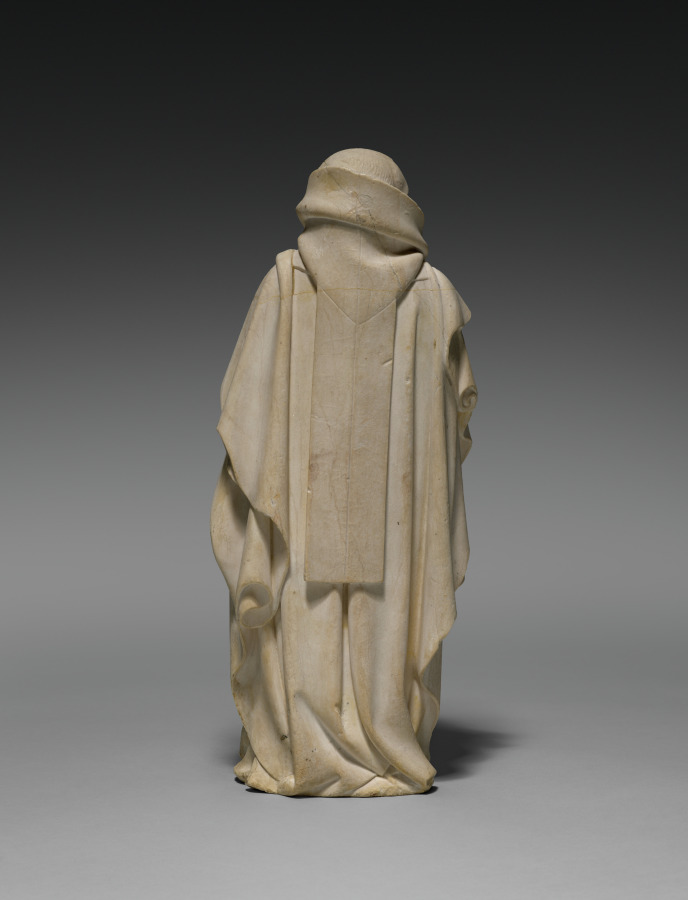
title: Mourner from the Tomb of Philip the Bold, Duke of Burgundy (1364–1404)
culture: Netherlands, active Dijon, 15th century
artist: Claus de Werve (Netherlandish, 1380–1439)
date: 1404–10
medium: vizille alabaster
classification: Sculpture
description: This figure comes from the tomb of Duke Philip the Bold from the church of Champmol near Dijon (Burgundy, France). Philip, who founded the monastery and designated it as his burial place, hired the best artists, many of whom came from the Netherlands. While the commission was given in 1381, the work was not completed until 1410, six years after the duke’s death. This mourner is unusual for the time because it is not carved as a static low relief on the pedestal of the tomb but interact with the viewers and their fellow procession members. The lifelike quality of the figure is due in large part to the alabaster. Its softness allowed artists to carve details into the material, and the transparent, milky white stone could also be polished to a high gloss.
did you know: The use of alabaster in the late Middle Ages began in the 1300s with court art in the circles of French kings, especially in the field of funerary sculpture.